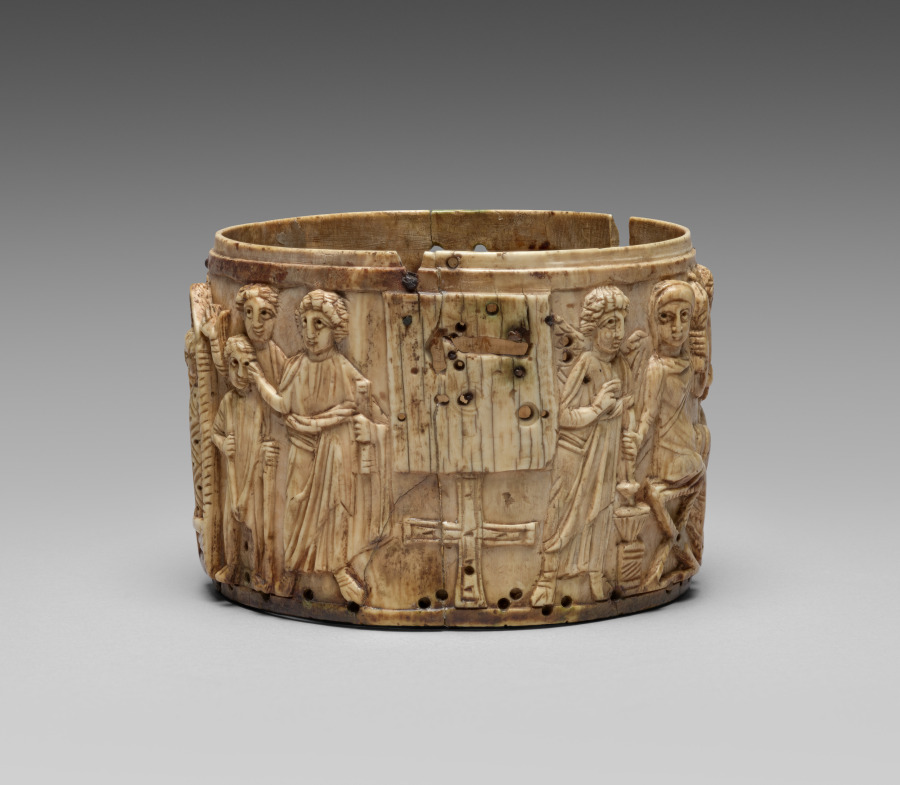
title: Ivory Pyx (Box)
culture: Byzantium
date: 500s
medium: ivory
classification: Ivory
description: Elaborately carved from a section of an elephant’s tusk, this ivory pyx (Greek for "box") depicts a number of New Testament scenes, namely the Annunciation, Christ’s entry into Jerusalem, Christ raising Lazarus, and Christ healing the blind man. It also depicts a Christian altar with chalices, possibly indicating the box’s use in a liturgical context.